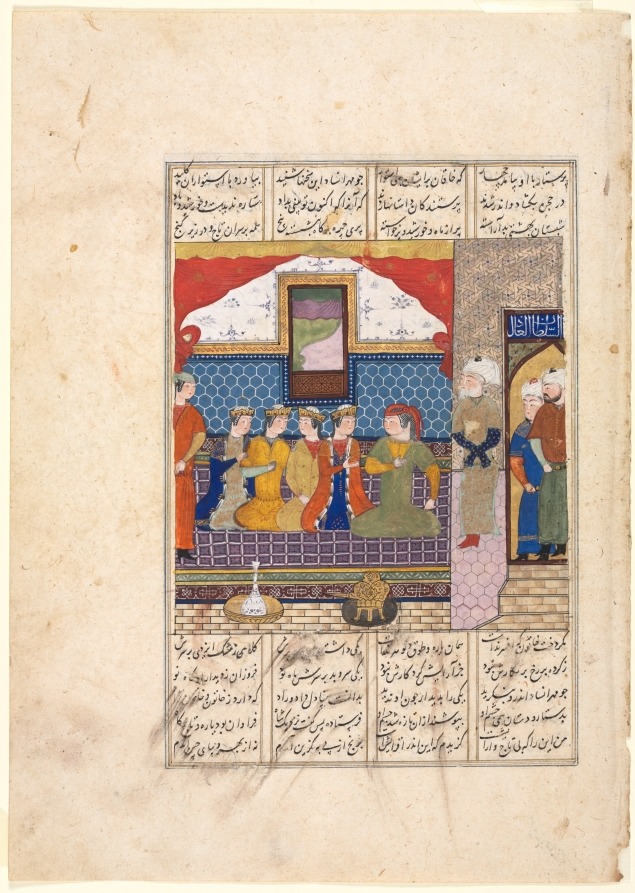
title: Nushirwan Sends Mihran Sitad to Fetch the Daughter of the King of China (recto) from a Shahnama (Book of Kings) of Firdausi (940–1019 or 1025)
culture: Iran, Shiraz, Timurid period (1370-1501)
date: c. 1482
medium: opaque watercolor, ink, and gold on paper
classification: Manuscript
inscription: Script: Nasta'liq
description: The Iranian painting traditions of creating a conceptual space, symmetry, and decoration characterize this illustration of a scene in the life of the Shi’a Imam Ali, son-in-law of the Prophet Muhammad. The inscription over the door reads “the just sultan.”